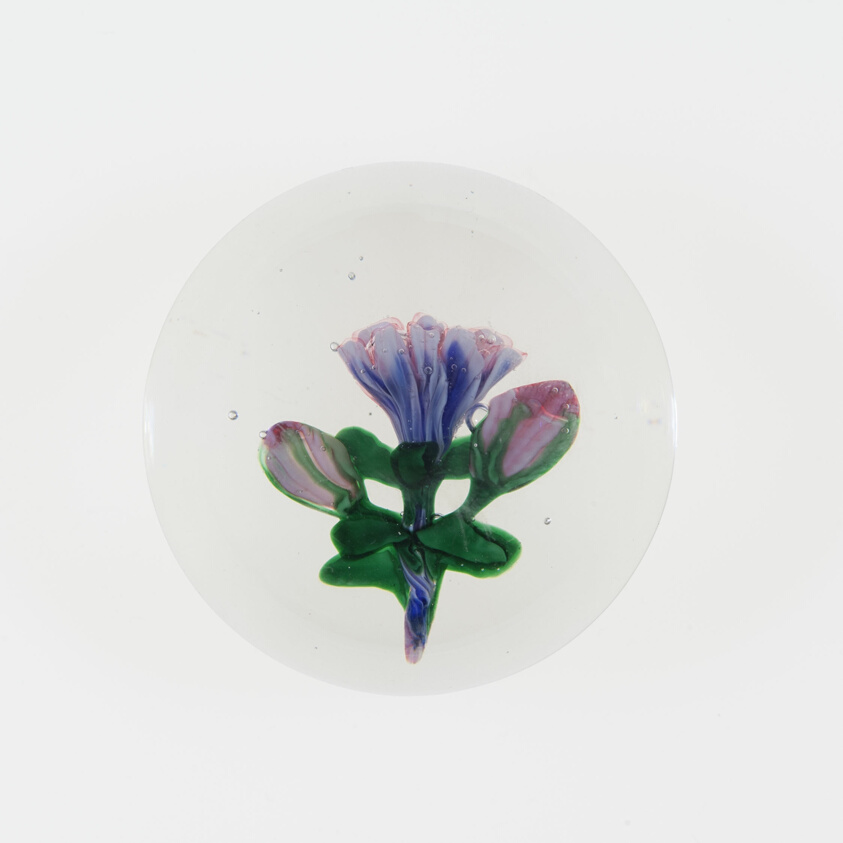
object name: Glass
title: Paperweight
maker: Clichy Glassworks (Cristalleries de Clichy); Clichy, France, 1837-1885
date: c. 1845/60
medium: Glass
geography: France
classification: paperweight; glass